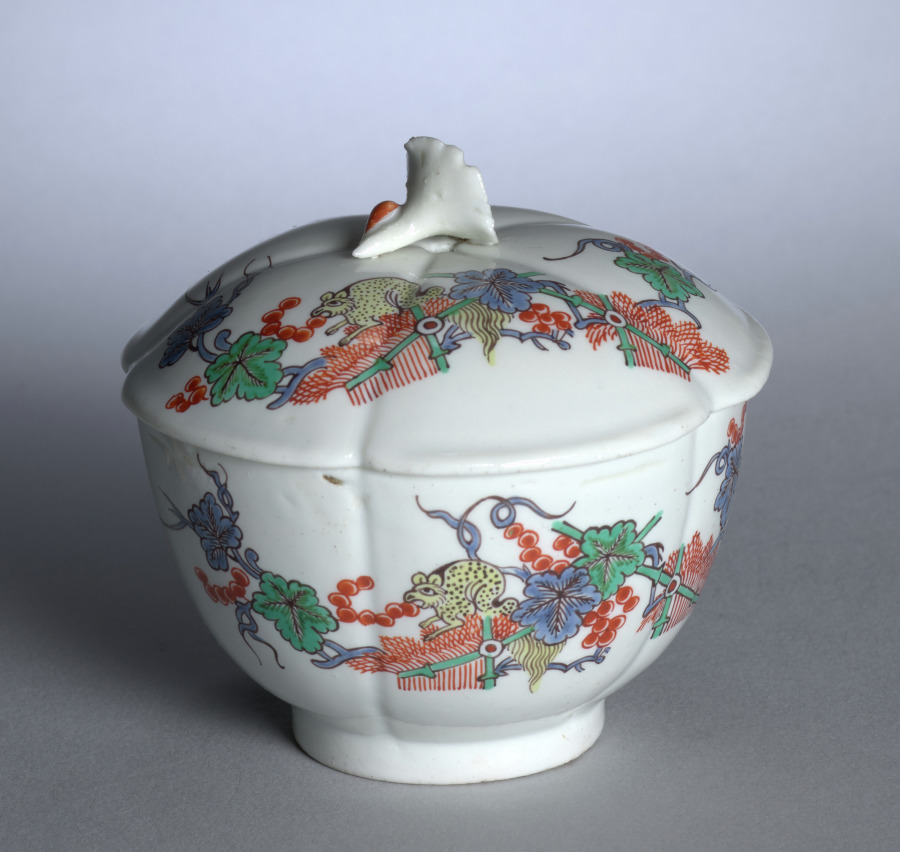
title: Sugar Bowl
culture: France, Chantilly, 18th century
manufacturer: Chantilly Porcelain Factory (French)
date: c. 1730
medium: soft-paste porcelain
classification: Ceramic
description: The pieces composing this individual tea set are entirely typical of Chantilly soft-paste porcelain in the Kakiemon style. Both the form and decoration of these pieces were inspired by Japanese prototypes. The use of knobs in the form of trumpet-shaped blossoms is characteristic of Chantilly wares.